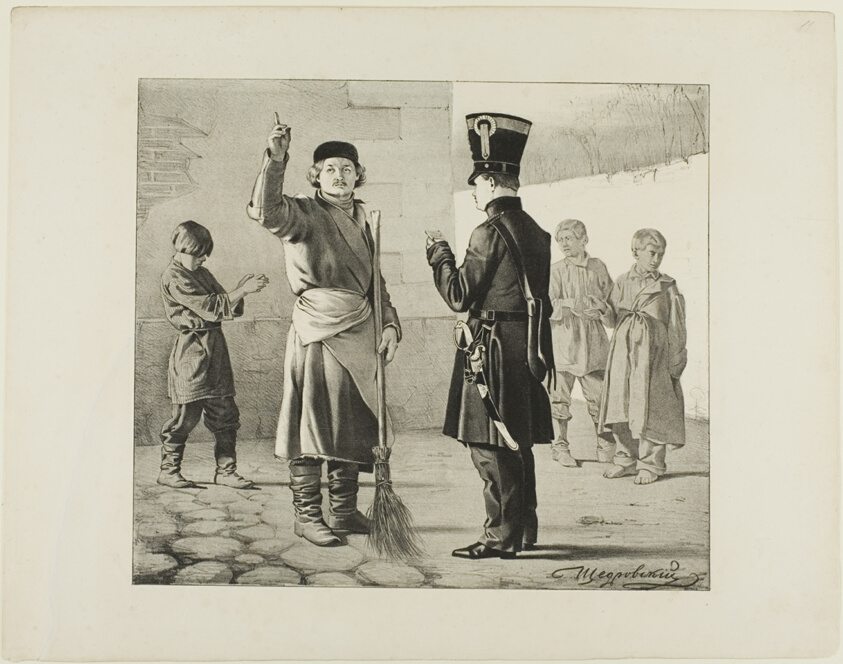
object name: Print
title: Scenes from Russian Folk Life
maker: Ignatii Stepanovich Shchedrovskii (Russian, 1815-1870)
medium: Color lithograph on paper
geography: Russia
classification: lithograph; print; prints and drawing